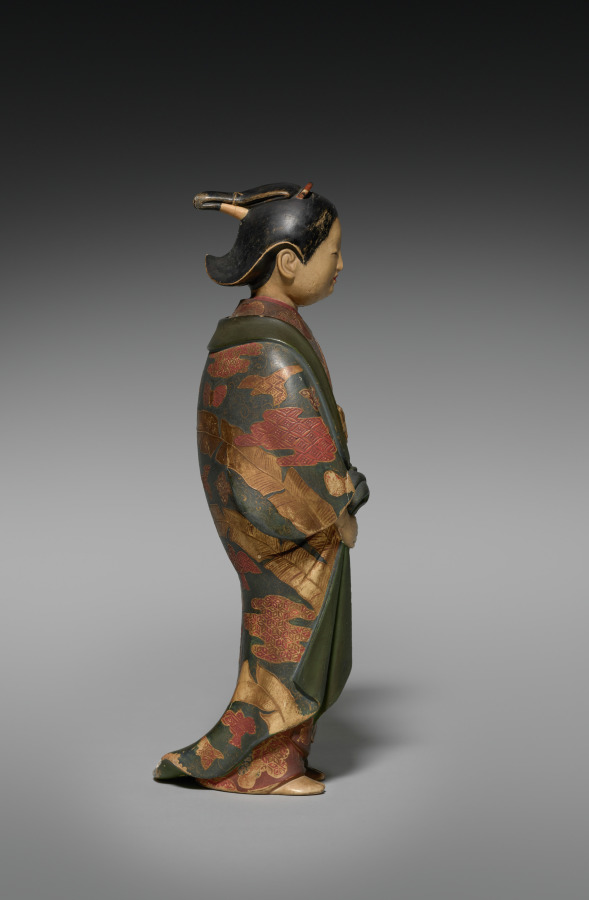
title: Saga Doll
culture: Japan, Edo period (1615–1868)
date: 1688–1703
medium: lacquered wood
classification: Sculpture